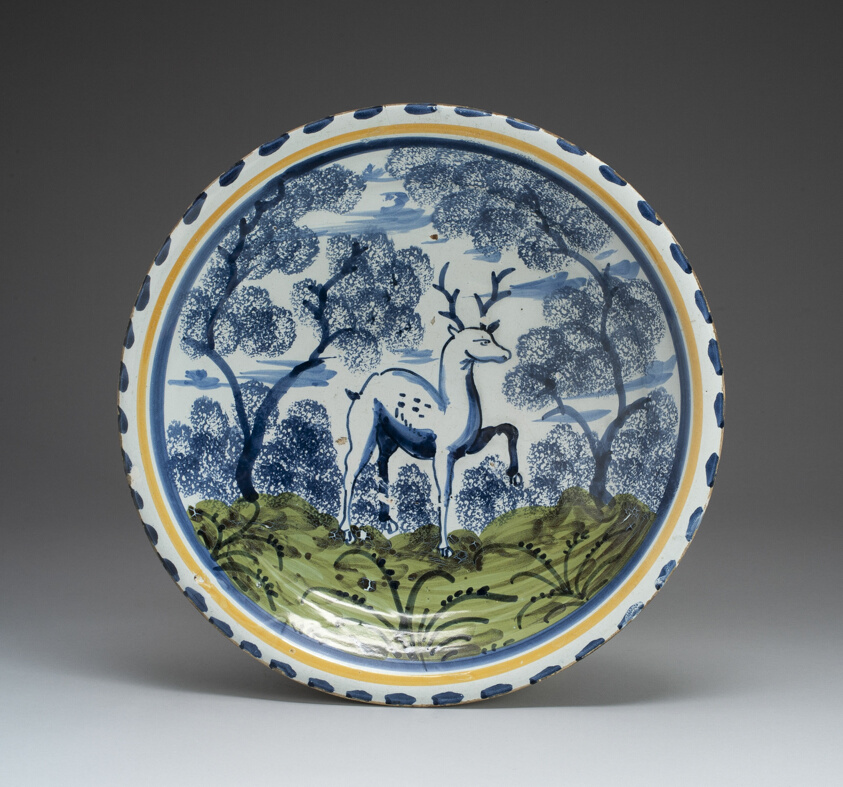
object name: Ceramics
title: Charger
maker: Bristol, England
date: 1700–50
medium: Tin-glazed earthenware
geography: Bristol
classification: ceramics; european decorative arts